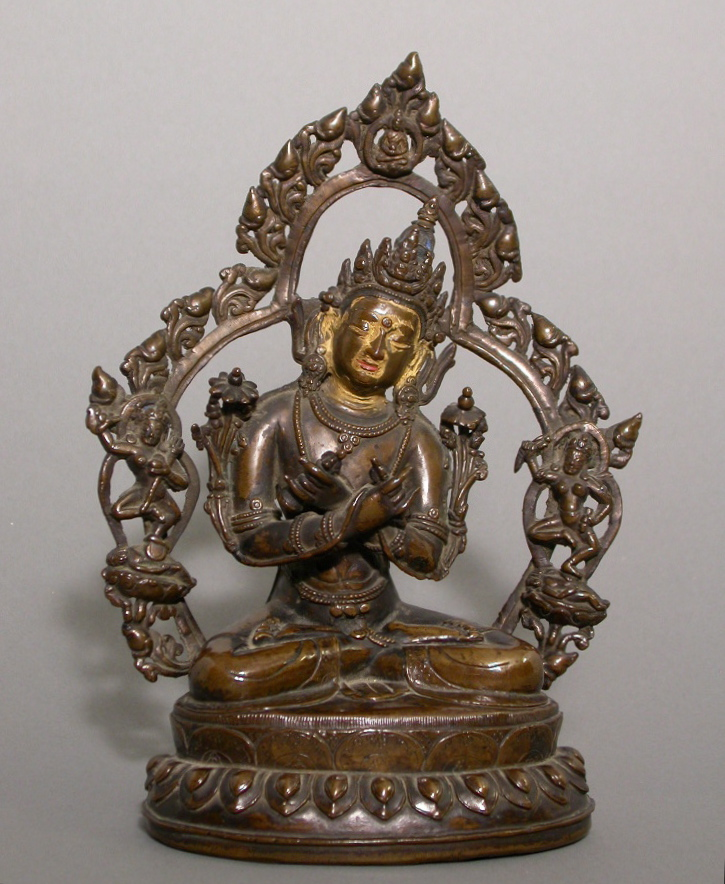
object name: Sculpture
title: Vajradhara Seated Holding a Thunderbolt (Vajra) and Bell (Ghanta)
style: Himalayan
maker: Tibet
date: 15th century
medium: Bronze with traces of pigment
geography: Tibet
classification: bronze; metal; sculpture; asian art